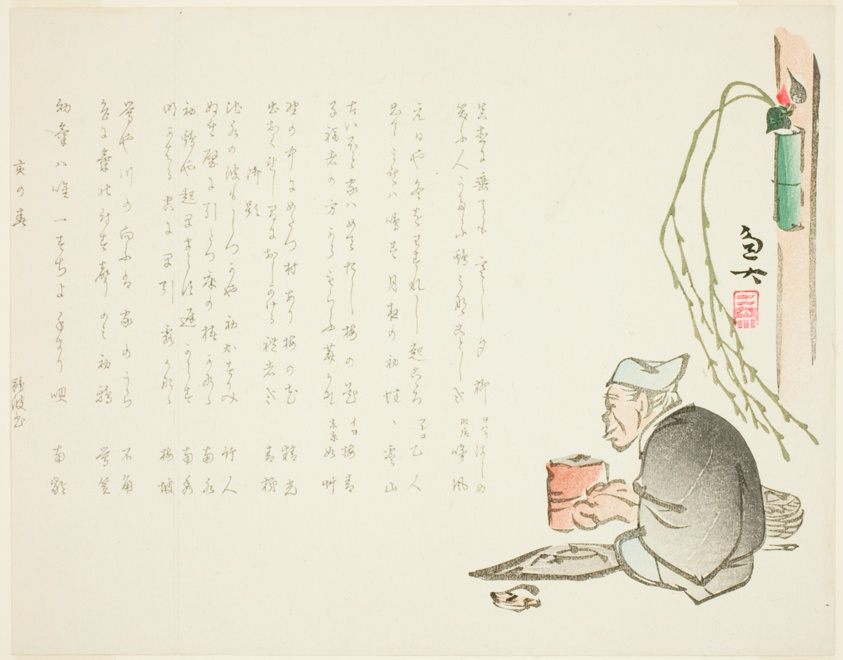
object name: Print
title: Elderly Tea Master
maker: Sato Gyodai (Japanese, late 18th to mid-19th century)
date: c.1875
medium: Color woodblock print; surimono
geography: Japan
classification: print; asian art